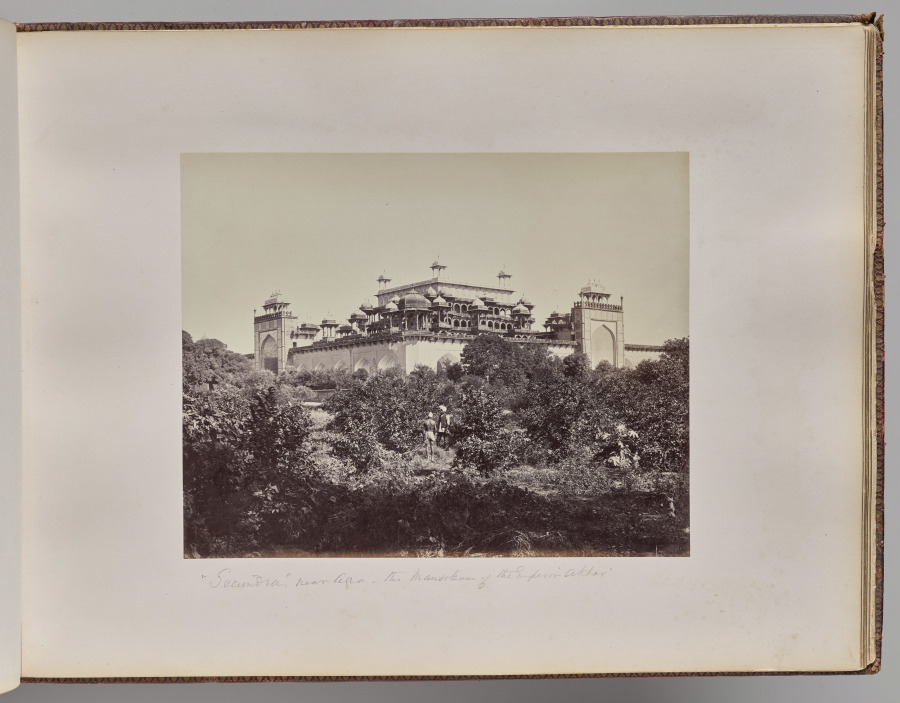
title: Secundra Near Agra. The Mausoleum of the Emperor Akbar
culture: England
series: Photographs of Northern India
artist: Samuel Bourne (British, 1834–1912)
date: 1863–70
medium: albumen print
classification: Photograph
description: The 50 images in this album, all taken in the 1860s, move from the hill towns of the Himalayas down to cities including Lahore (now in Pakistan), Delhi, Lucknow, Agra, Benares (now Varansi), and Calcutta (now Kolkata). Architectural studies of major monuments offer valuable historical records of what sites such as the Taj Mahal and the imperial mosque of the Mughal emperors in Delhi looked like before 20th-century restorations.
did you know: Samuel Bourne, the author of most the images in this album, was a banker in England before he moved to India to become a professional photographer.